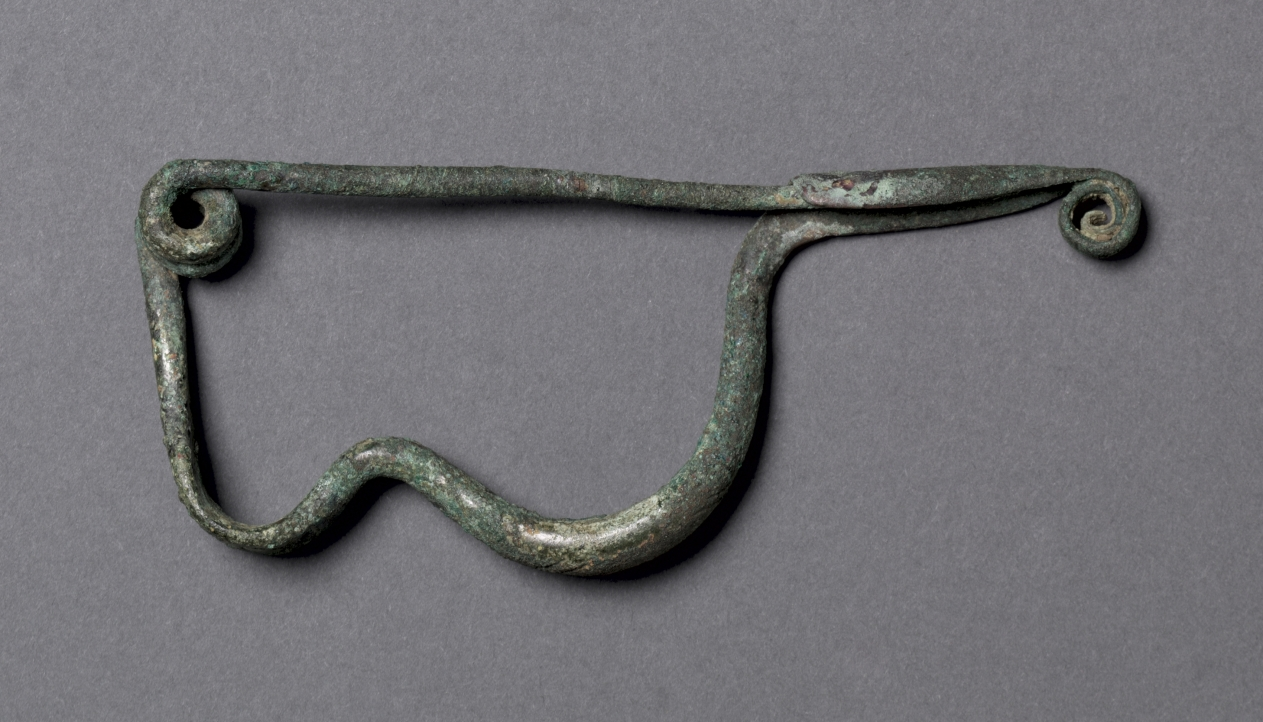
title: Fibula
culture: Italy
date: c. 700 BCE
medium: bronze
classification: Jewelry